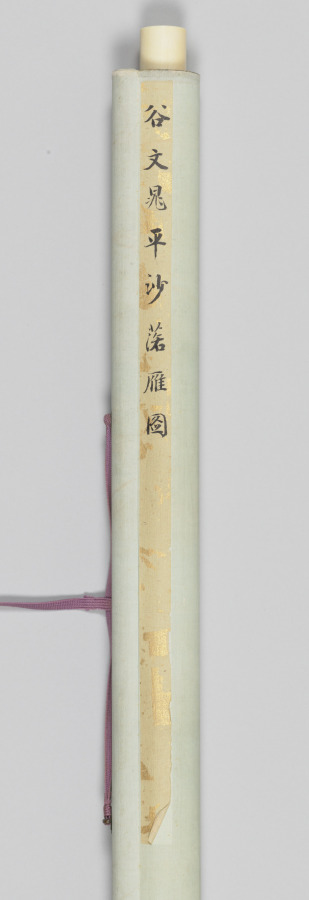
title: Wild Geese Descending on a Sandbar, from Eight Views of Xiao-Xiang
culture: Japan, Edo period (1615–1868)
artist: Tani Bunchō (Japanese, 1763–1841)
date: 1788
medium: album leaf remounted as a hanging scroll; ink and color on paper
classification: Painting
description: This painting was part of a set of album leaves representing the Eight Views of Xiao-Xiang, a theme originating in Chinese poetry and painting that spread to both Korea and Japan. Southern China’s Xiao-Xiang area, where the mist-covered banks of the Xiang River created a complex landscape shifting like the moods and minds of people, captured the imaginations of generations of painters and calligraphers. Inscriptions on these works suggest that they were possibly ordered by newly prominent Japanese Confucian scholars.